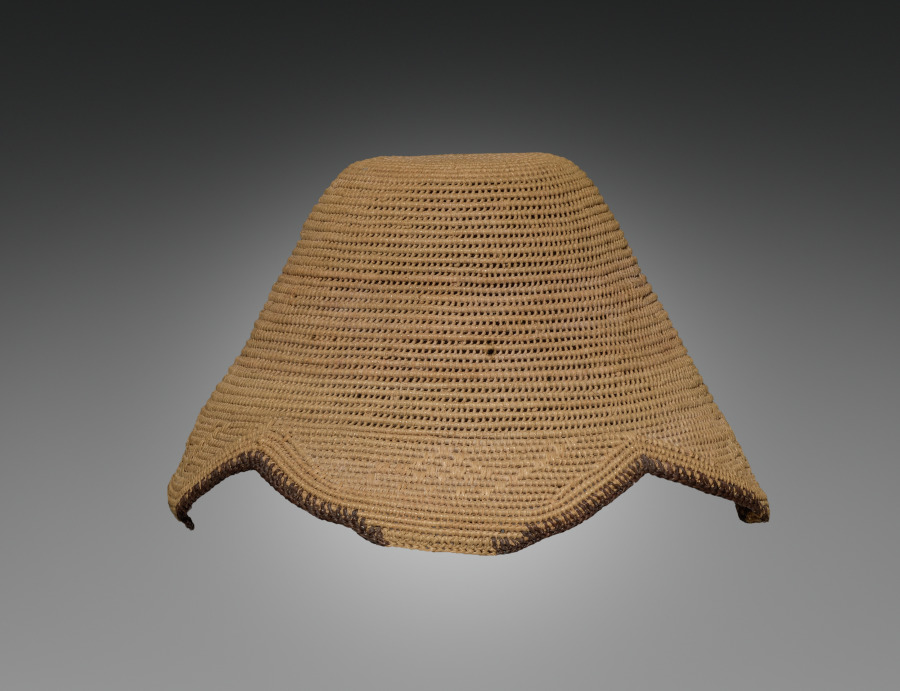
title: Hat (laket)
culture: Africa, Central Africa, Democratic Republic of the Congo, Kuba-style maker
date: early 1900s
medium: Raffia and dye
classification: Garment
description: Titled Kuba men and prominent women wear the laket, a small ornate dome-shaped hat. An essential fashion item of adult men in good social standing, it focuses special attention on the head as a significant marker of individual identity, ethnic affiliation, status, and role in society. This prestige object is secured on the crown of the head with a nine-and-a-half-inch metal pin that pierces through the hat onto a clump of hair. This laket is made from raffia palm fiber coiled into threads and woven in different patterns. There are two examples of the laket: the plain type with the flat top, and the more elaborate type called the laket mishiing.